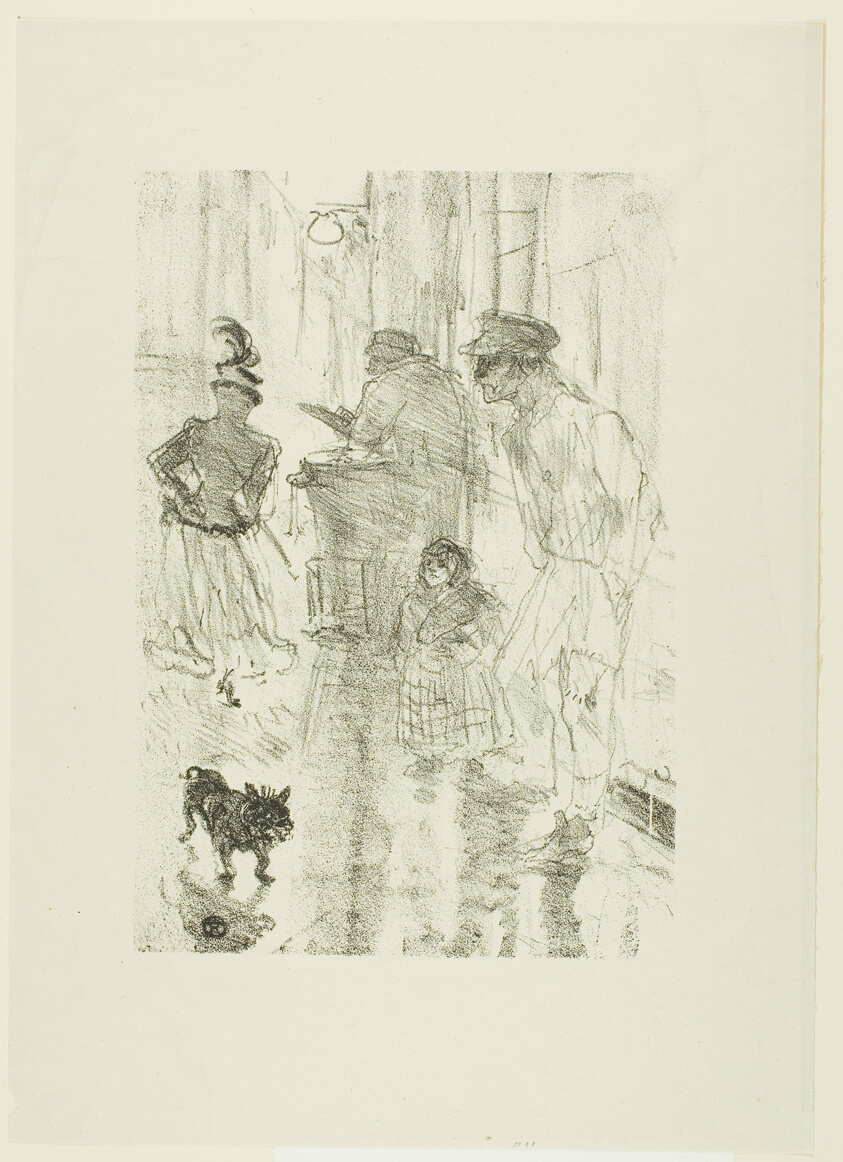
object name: Print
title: The Chestnut Vendor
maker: Henri de Toulouse-Lautrec (French, 1864-1901)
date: 1897, printed and published 1925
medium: Lithograph on grayish-ivory wove paper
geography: France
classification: lithograph; print; prints and drawing